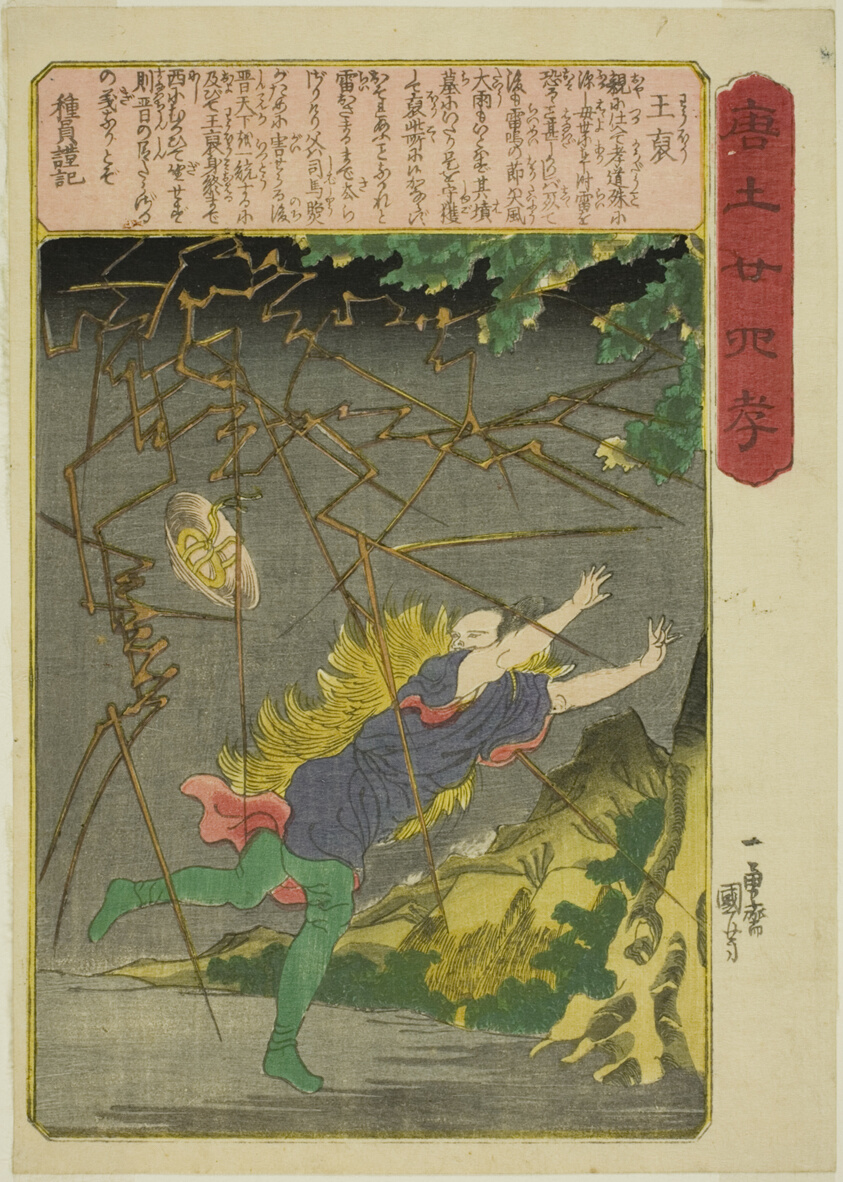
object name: Print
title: Wang Pu (O ho), from the series "Twenty-four Paragons of Filial Piety in China (Morokoshi nijushiko)"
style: Japanese (culture or style)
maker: Utagawa Kuniyoshi (Japanese, 1797-1861)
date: c. 1848/50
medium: Color woodblock print; chuban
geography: Japan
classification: woodblock print; print; asian art